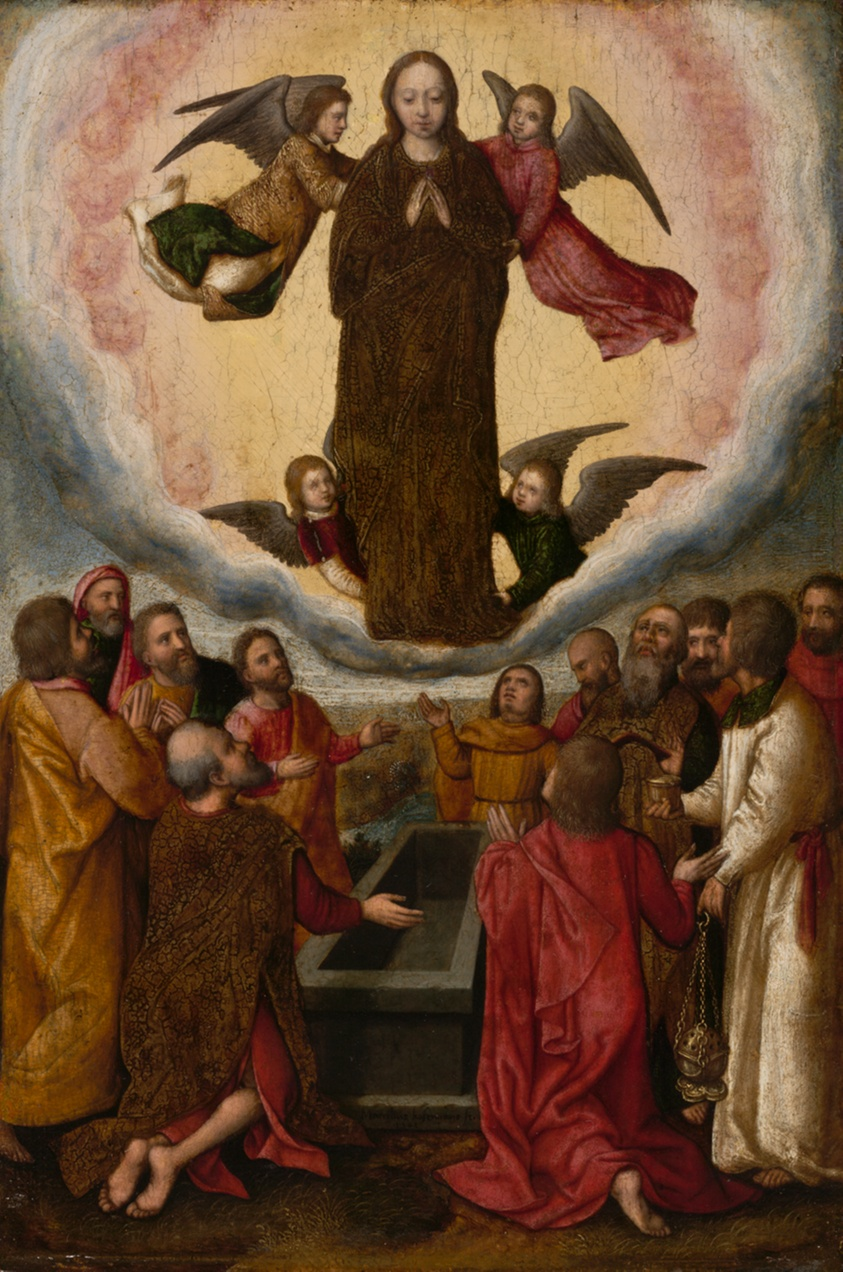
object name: Painting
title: Assumption of the Virgin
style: sixteenth century, 16th Century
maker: Marcellus Coffermans (Netherlandish, 1524–1581)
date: 16th century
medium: Oil on panel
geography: Flanders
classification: painting; oil on panel; oil paintings (visual works); paint; european painting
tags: Virgin Mary, spiritual, figures, religious figures, religious scenes, religious, religion, Christianity, Christian subjects, Devotion, men, angels, death